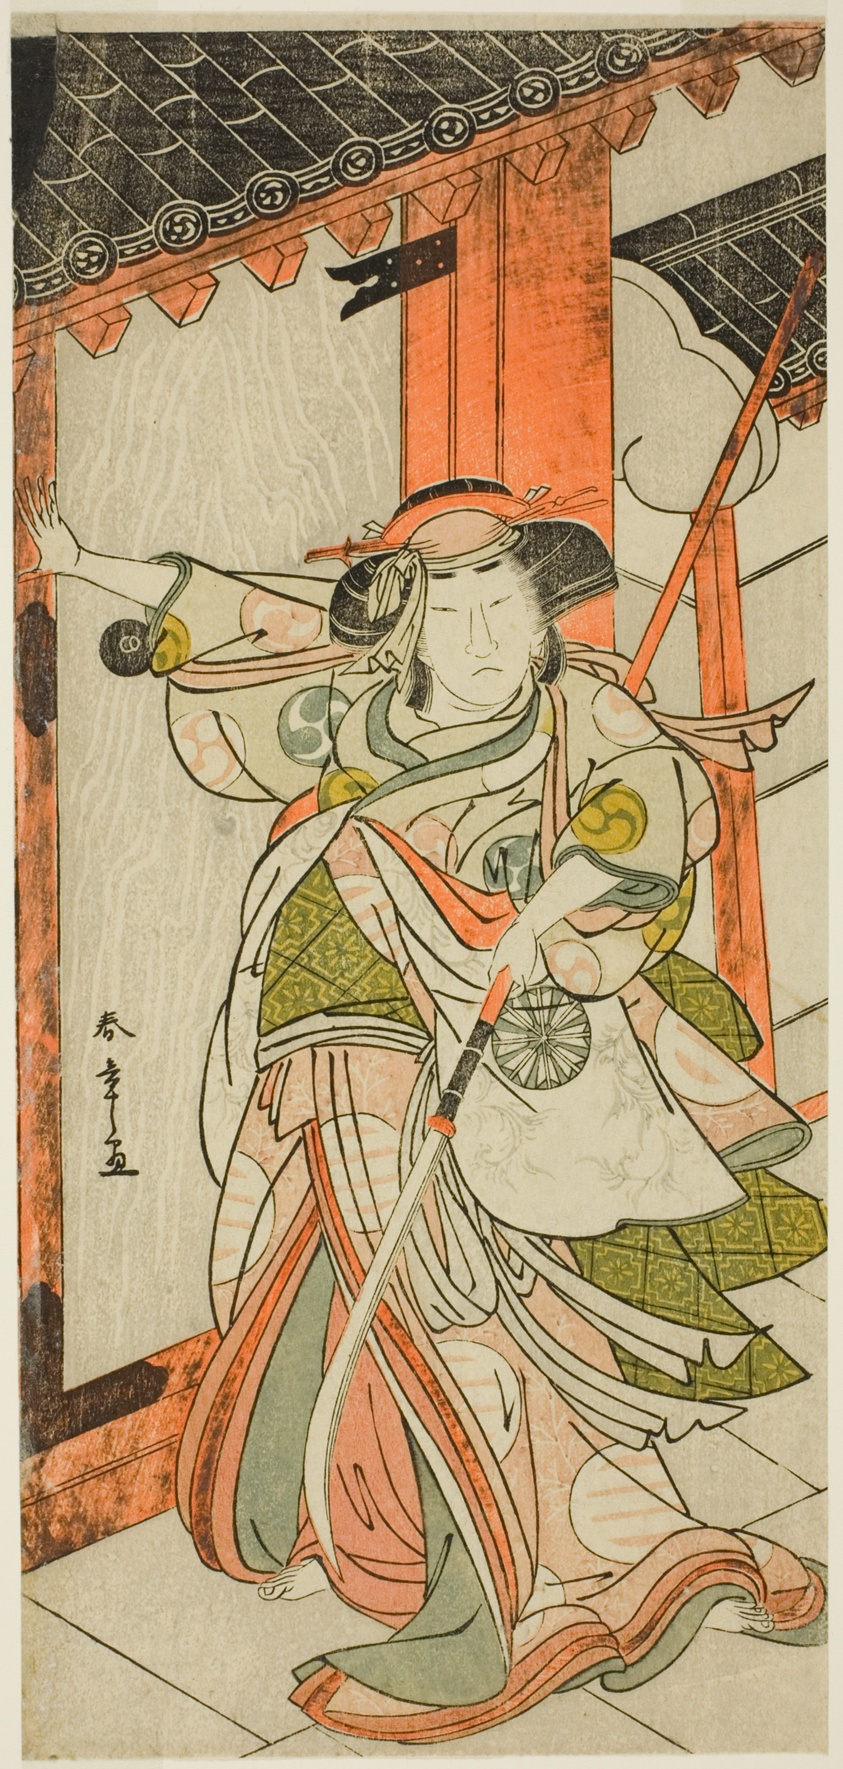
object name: Print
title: The Actor Nakamura Tomijuro I as Hangaku Gozen Breaking Down the Gate in the Play Wada-gassen Onna Maizuru (The Wada Conflict: A Woman's "Maizuru"), Performed at the Nakamura Theater from the Twenty-fifth Day of the Seventh Month, 1777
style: Japanese (culture or style)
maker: Katsukawa Shunsho 勝川 春章; Japanese, 1726-1792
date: c. 1777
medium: Color woodblock print; hosoban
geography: Japan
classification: woodblock print; print; asian art